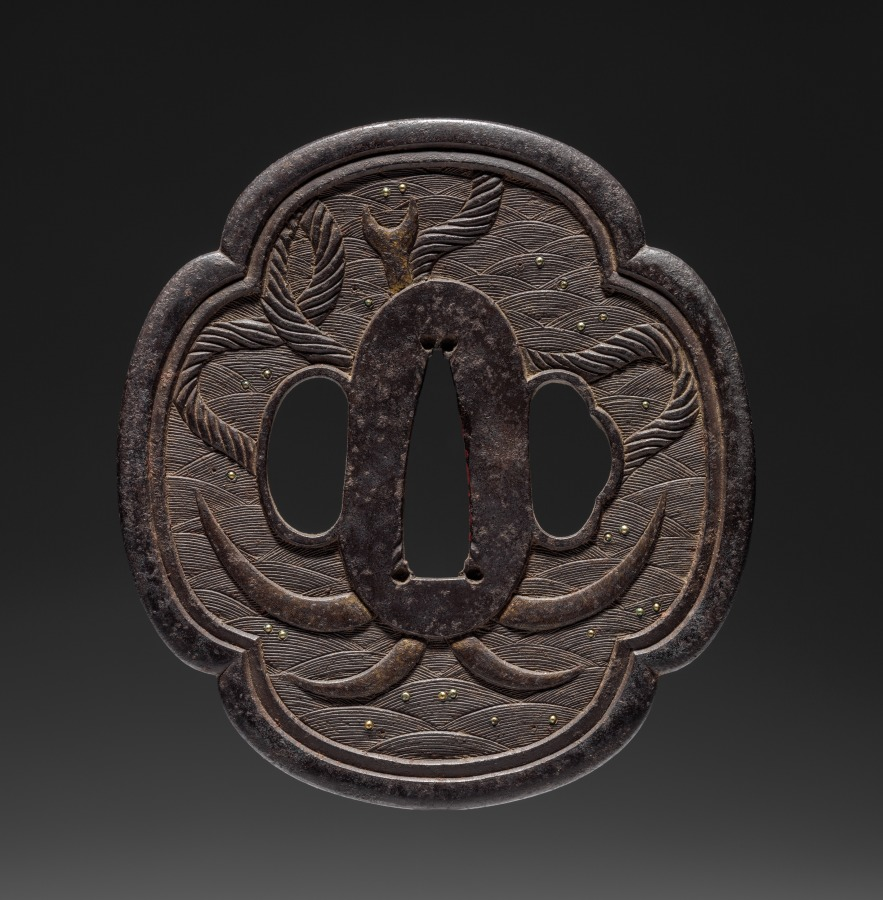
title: Sword Guard (Tsuba) with Anchor in Waves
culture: Japan, possibly Edo period (1615-1868)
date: c. 1615–1868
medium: iron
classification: Arms and Armor